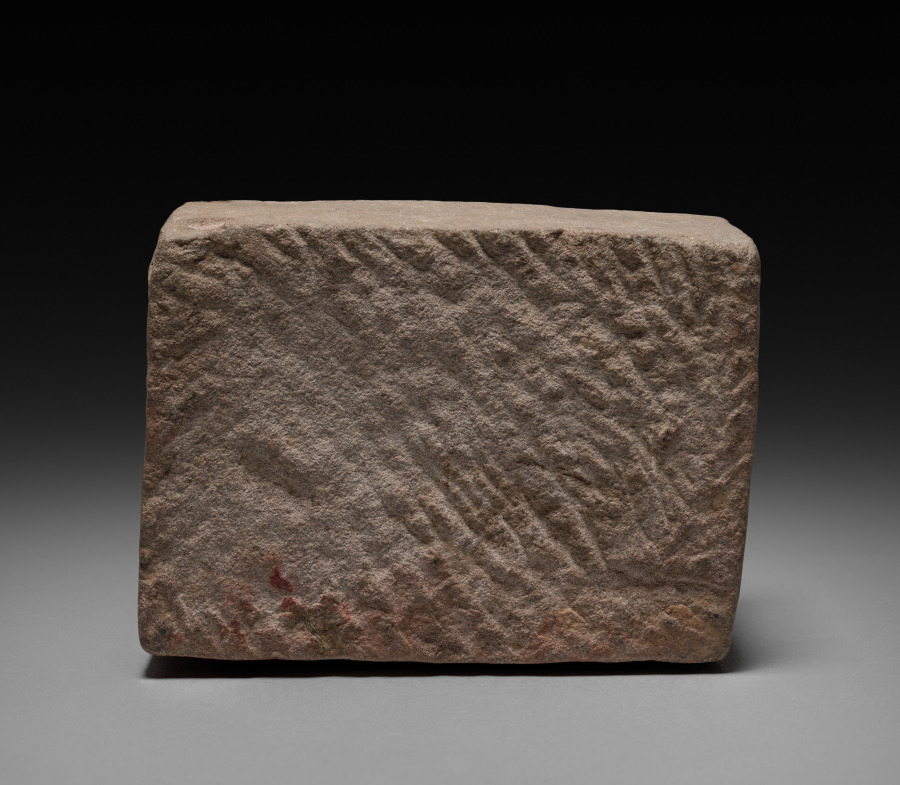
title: Bodhisattva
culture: China, Sui dynasty (581-618) - Tang dynasty (618-907)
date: late 500s–early 600s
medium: stone with polychromy and gilding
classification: Sculpture